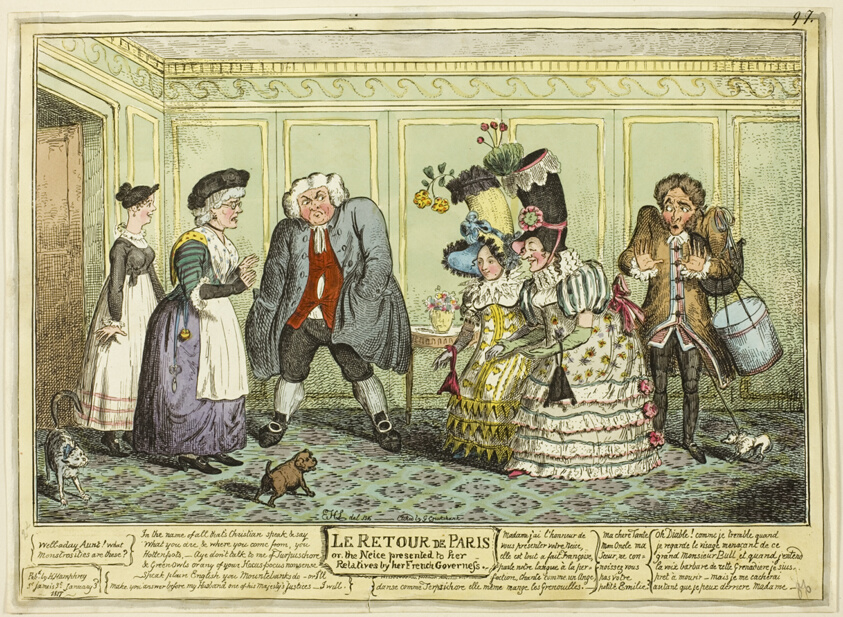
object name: Print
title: The Return of Paris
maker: George Cruikshank (English, 1792-1878); published by Hannah Humphrey (English, c. 1745-1818)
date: published January 3, 1817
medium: Hand-colored etching on paper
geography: England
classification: etching; print; prints and drawing